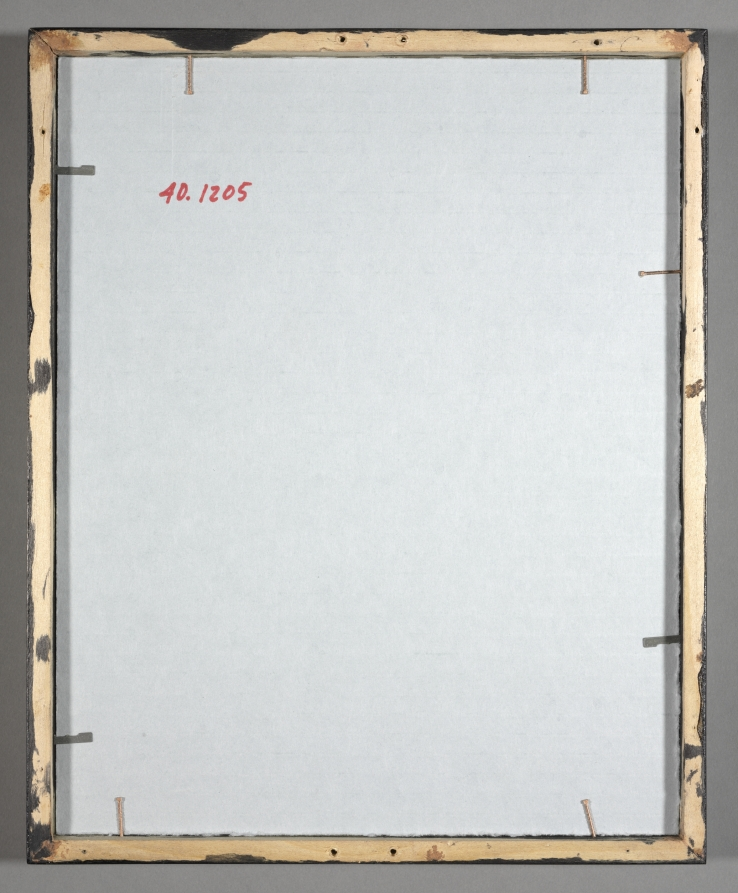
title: Portrait of Anne Hyde, Duchess of York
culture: England, 17th century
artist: Nicholas Dixon (British, c. 1708)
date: c. 1662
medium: watercolor on vellum in a large wooden frame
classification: Portrait Miniature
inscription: Label inside of back: Henry J. Murcott, London. Written in ink on backing: "Anny Hyde, first Wife of James II, Mother of Queen Mary II, Queen Anne. From Lord Currie's collection."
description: Though knowledge about his birth and training remain obscure, Nicholas Dixon is known to have been a favorite miniature painter of the English court at the close of the seventeenth century. He succeeded Samuel Cooper (1608/9–1672) as limner to King Charles II in 1673 and was Keeper of the King’s Picture Closet, for which he was granted an irregularly paid annuity of £200. Dixon painted a substantial number of ambitiously scaled miniatures—which became increasingly uncommon among practitioners of the art form when the more constrictive support of ivory supplanted vellum in the early 1700s. Dixon often signed his work with the monogram ND, and many of his large cabinet miniatures were copies of portraits, religious scenes, and mythological paintings by old masters, thirty of which formed part of the collection of the dukes of Portland. Among the characteristics of his style are ruddy flesh tones and drowsy eyes, and like the work of John Hoskins (c. 1590–1665), who may have been his teacher, Dixon favored softer modeling and diffuse lighting of his subjects, as opposed to the dramatic shadows employed by Cooper. Two lottery schemes—one in 1684/85 and the other in 1698— involving the exhibition of miniatures and the distribution of cash prizes proved disastrous for Dixon, who was in financial ruin by 1700 and constrained to sell a large number of works from the lottery. Anne Hyde (1637–1671), the sitter in this portrait, was around the age of twenty-four when the miniature was painted. She faces right and sits upon a dull red chair before a dressing table covered with a deep red embroidered cloth or tapestry that is fringed at the edges. A mirror and open jewel box lie on a table that is in front of a dark green curtain. The sitter has gray eyes and wears a golden brown satin décolleté dress with white ruffled undersleeves ornamented with jeweled closures. A necklace of large pearls hangs around her neck, and jeweled brooches fasten a winding rope of pearls to the bodice of her gown. Her right elbow rests on the table, and her fingertips comb through her long, wavy brown hair, which falls over her shoulders to below her waist. Her left arm extends toward her knee as she lightly holds a measure of her sash under her thumb while pointing downward with her index finger. The gracefully arranged, tapered fingers indicate Restoration court refinement.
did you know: This portrait is after a well-known and frequently copied oil painting by Peter Lely; it is nearly identical but with crimson and gold drapery in place of the dressing table and mirror.